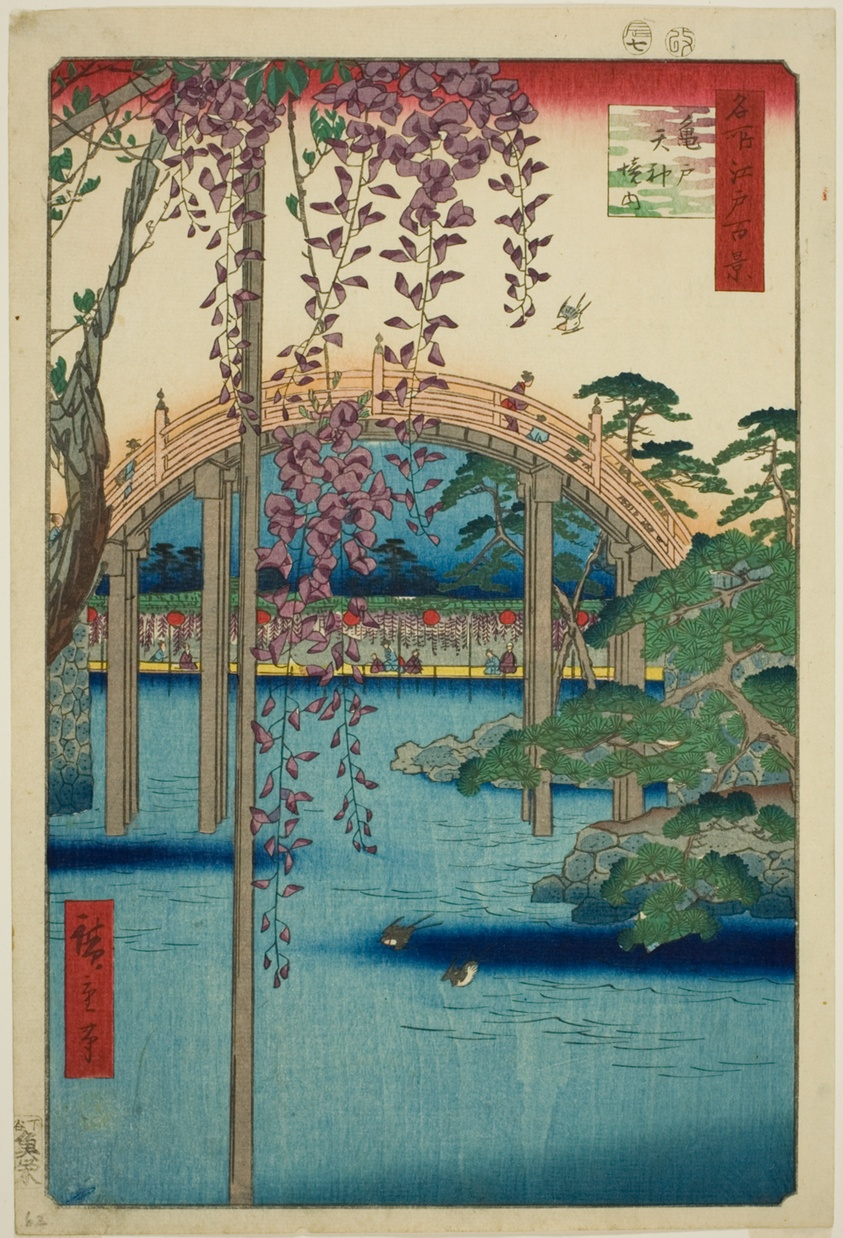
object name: Print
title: Precincts of Kameido Tenjin Shrine (Kameido Tenjin keidai), from the series "One Hundred Famous Views of Edo (Meisho Edo hyakkei)"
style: Japanese (culture or style)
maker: Utagawa Hiroshige 歌川 広重; Japanese, 1797-1858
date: 1856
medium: Color woodblock print; oban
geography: Japan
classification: woodblock print; print; asian art